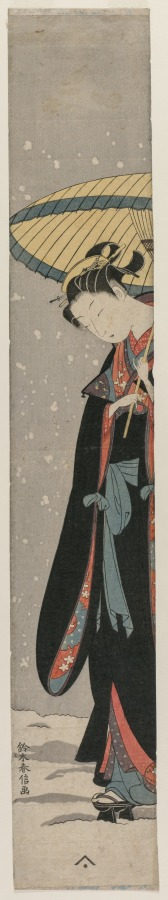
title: Young Woman Walking in Snow with Umbrella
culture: Japan, Meiji period (1868–1912)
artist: after Suzuki Harunobu (Japanese, 1724–1770)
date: c. 1868–1912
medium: Woodblock print; ink and color on paper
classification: Print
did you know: Pillar prints, or hashira-e (柱絵), are long and narrow Japanese woodblock prints originally intended to decorate wooden pillars.